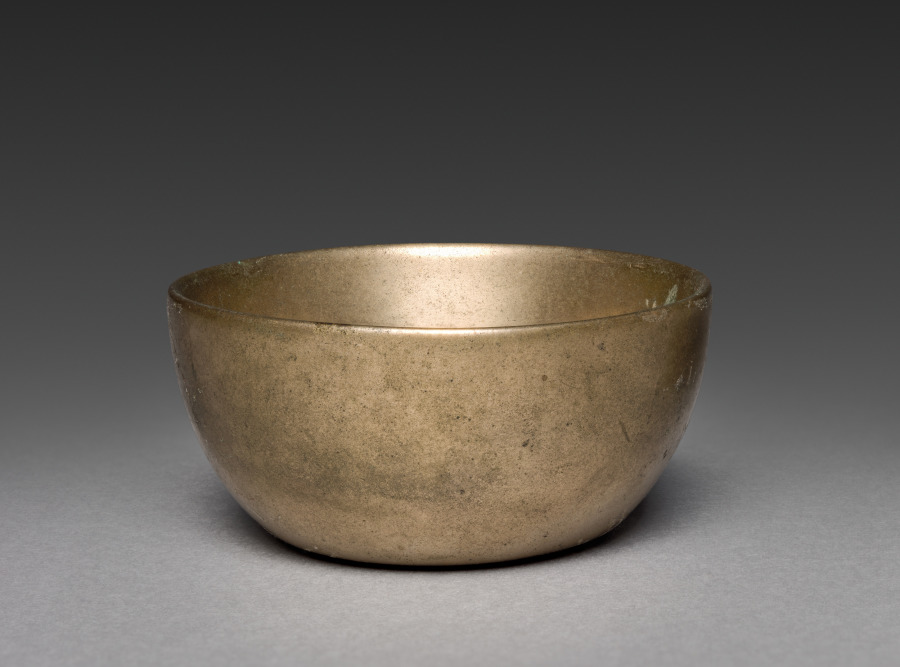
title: Wine Cup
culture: North Korea, Yochon, unassigned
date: unassigned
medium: brass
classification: Metalwork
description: In ancestor veneration rituals, deceased parents or ancestors are sanctified as spirits who are believed to oversee their descendants. Three times a year, once at the lunar new year, once at the person’s death date, and once at the time of the mid-autumn festival, food would be placed on the table for the ancestors, including fruits, rice, meat, and rice wine. During these ceremonies the worshipers’ attitude was as reverential toward the objects meant to embody the ancestors’ spirits as that toward a living parent. This pair of brass cups may have been used for ancestral rituals to contain rice wine.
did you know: This pair of bronze cups may have been used in family rituals such as ancestral worship ceremonies.